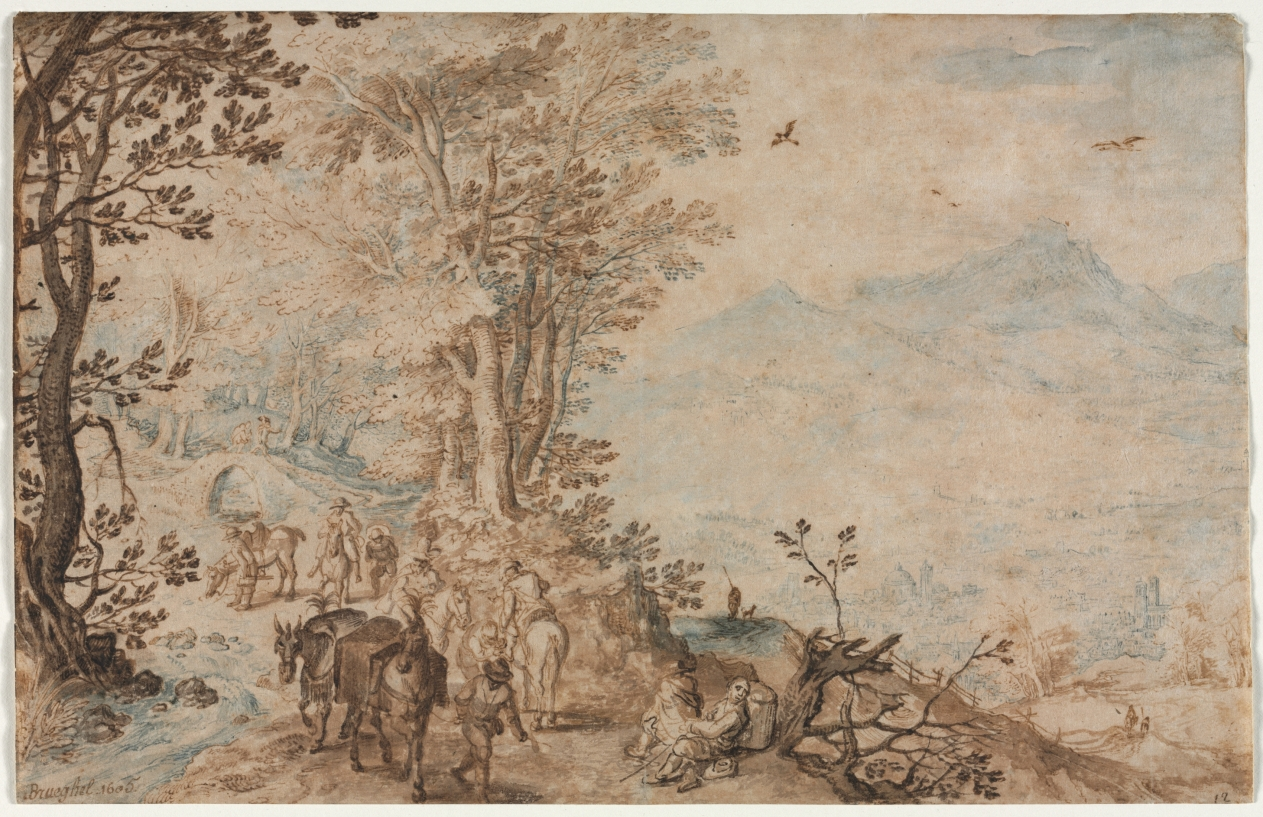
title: Landscape with Travelers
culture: Flanders, early 17th Century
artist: Jan Brueghel (Flemish, 1568–1625)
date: 1605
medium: pen and brown ink and brush and brown wash and blue watercolor over stylus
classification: Drawing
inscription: signed [falsley ?], lower left, in brown ink: Brueghel .1605. ; lower right, in black ink: 12 ; VERSO, upper left, in graphite: No / 40 ; lower left, in brown ink: Daer Abraham / met syn volck de lantsyen en nemen [?]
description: A son of Pieter Bruegel the Elder, Jan traveled in Italy in the 1590s and later enjoyed a successful career in Antwerp, where he eventually became court painter to the Habsburg regents. As a painter, he specialized in floral still lifes and landscapes, sometimes collaborating with his friend Peter Paul Rubens. His drawings, however, are almost exclusively landscapes. Bruegel intended them to be sold as independent works, rather than as preparatory studies for paintings. The date indicated in the lower left corner of this sheet may be correct, but, along with the artist's name it seems to have been added by a later hand.